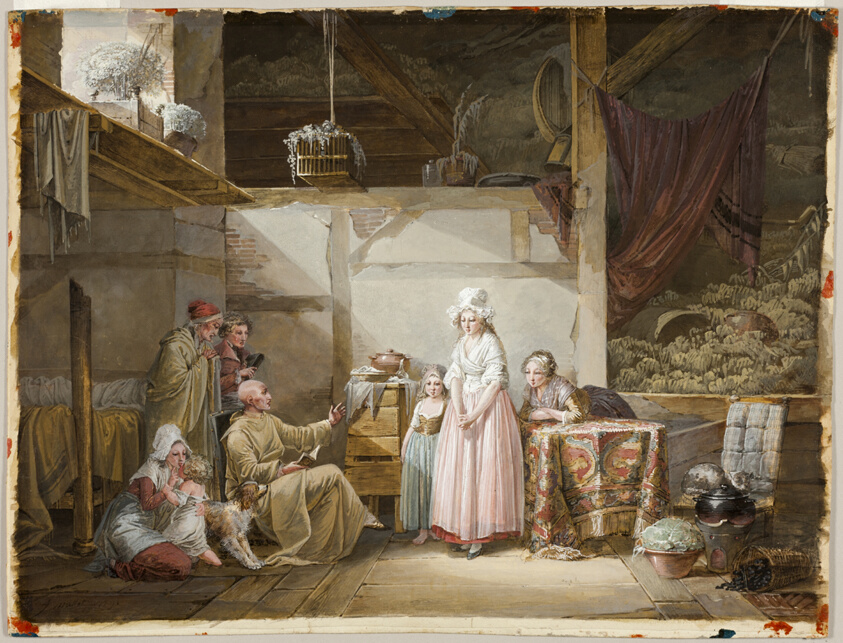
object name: Drawing and Watercolor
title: The Evening Prayer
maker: Jean-Baptiste Mallet; French, 1759-1835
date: 1790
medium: Opaque watercolor, over traces of black chalk, on cream laid paper, laid down on card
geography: France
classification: watercolor; prints and drawing; paper